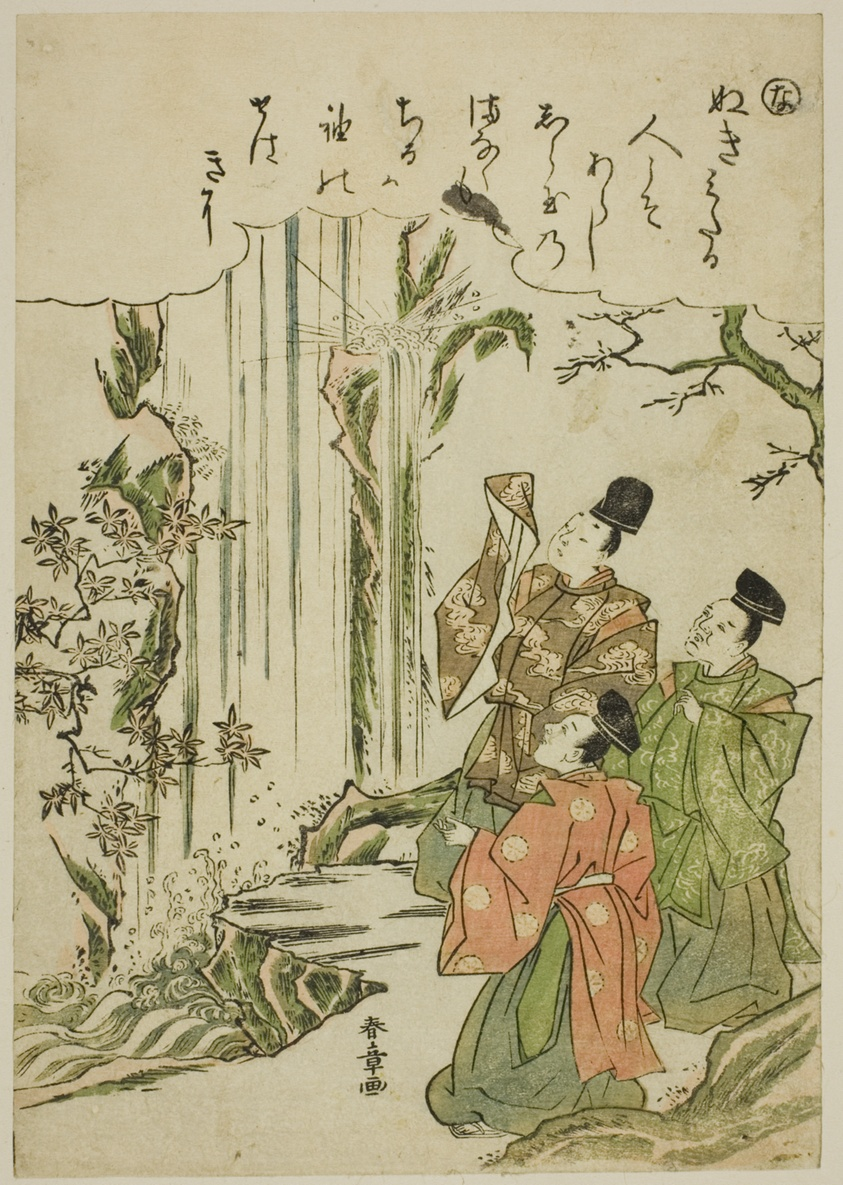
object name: Print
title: "Na": Nunobiki Waterfall, from the series "Tales of Ise in Fashionable Brocade Pictures (Furyu nishiki-e Ise monogatari)"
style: Japanese (culture or style)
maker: Katsukawa Shunsho 勝川 春章; Japanese, 1726-1792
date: c. 1772/73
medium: Color woodblock print; koban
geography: Japan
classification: woodblock print; print; asian art